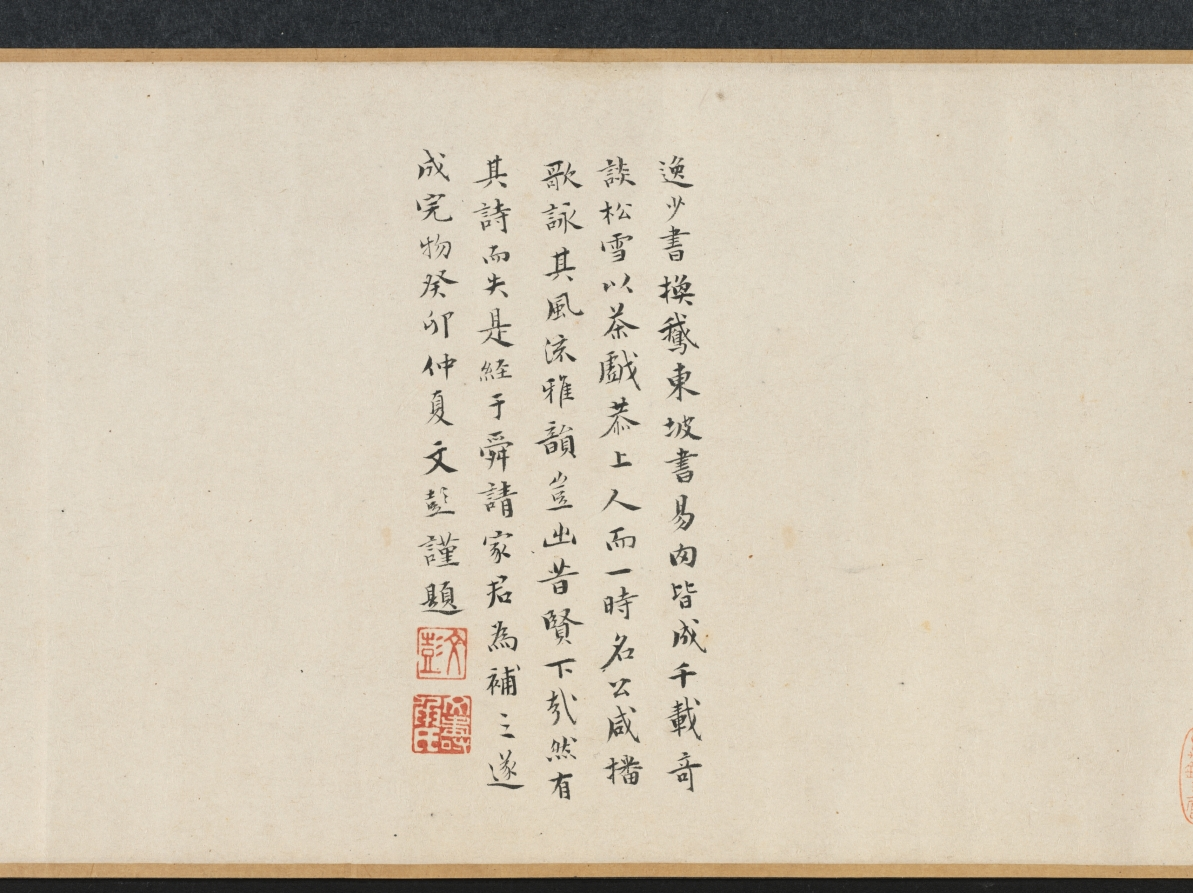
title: Zhao Mengfu Writing the Heart (Hridaya) Sutra in Exchange for Tea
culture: China, Ming dynasty (1368–1644)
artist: Qiu Ying (Chinese, 1494–1552)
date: 1542–43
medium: handscroll, ink and light color on paper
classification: Painting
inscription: Inscription accompanying text of "Heart" sutra, by Wen Zhengming 文徵明 (1470-1559): Zhengming 徵明, written in a boat at Kunshan 崑山, on the twenty-first day of the ninth month, in the renyin 壬寅 year, the twenty-first year of the Jiajing era [1542].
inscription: Colophon by Wang Shih-mou: Chou Yü-shün [Feng-lai] of K'un-shan was a scholarly, refined connoisseur of antiquities. He had acquired the poem written by Chao Ch'eng-chih [Chao Meng-fu] about the exchage of tea for Chao's calligraphy of the Prajna sutra. But the sutra itself, also written by Chao Meng-fu, is lost. He therefore asked Ch'iu Shih-fu [Ch'iu Ying] to do a painting and had Wen Cheng-ming, the artist-in-attendance, write the Hridaya Sutra in the "small, regular" style for replacement. Both works are so excellent that even Chao Meng-fu himself would certainly applaud if he should be reborn to see them. I, Shih-mou, had gotten possession of this scroll from the family of Chou Yü-shün, and since it was so wonderfully matched with one of the treasures in my collection. the Hridaya Sutra written by Chao Meng-fu for Priest Li in "running script," like the reuniting of two halves of a jade pi, I completed the scroll with the several colophons written for the "tea-exchange" poem. I did this because the painting of Ch'iu Ying and the calligraphy of Wen Cheng-ming are definitely masterpieces by themselves with absolutely no need to depend on any of the colophons written for the Chao Meng-fu poem. Furthermore, the two sons of Wen Cheng-ming, Shou-ch'eng [Wen P'eng] and Hsiu-ch'eng [Wen Chia]. have each written a colophon explaining the reason for replacing the calligraphy. As their writings are both acceptable for high standard, I didn't want to throw them away. [So by separating these into two scrolls] I was able to get two complete works of art in one clever stroke. I was quite pleased with myself, and hope that those who see this scroll shall not get suspicious because of the missing colophons. Wang Shih-mou wrote in his Jih-sun-chai study, on the first day of the tenth month, in the chia-shen year of the Wan-li era [1584].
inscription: Colophon by Wen P'eng: I-shao [Wang Hsi-chi] wrote in exchange for a flock of geese. Su Tung-po wrote in exchange for meat. Both episodes have become legends of a thousand years. Sung-hsüeh [Chao Meng-fu] "teased" Priest Kung for tea, and the story was immediately immortalized in the poems by all the famous scholars of the times. Indeed, how could one say his humor and elegance are not equal to the ancient worthies? Unfortunately, the poetry has survived but the writing of the sutra is lost. Yü-shün [Chou Feng-lai] therefore asked my father to make up the writing and so here is the complete work of art. Respectfully inscribed by Wen P'eng in the mid-summer of 1543.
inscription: Colophon by Wen Chia: Sung-hsüeh [Chao Meng-fu], in exchanging tea leaves for his writing of the Prajna, had put himself in the company of Yu-chün [Wang Hsi-chih] who exchanged geese for his writing of the Huang-t'ing sutra [the Yellow Chamber, or the Wai-ching ching, a Taoist text attributed to the Yellow Emperor]. However, was this romantic and cultivated gesture really intended for such small things? Actually, he was only proud that the excellence of his calligraphy had made him worthy to be the successor of the Ch'in Dynasty master. Since, very unfortunately, Chao Meng-fu's writing [of the Prajna] was already lost, my father therefore agreed to replace it, and did the calligraphy in the style of the Yellow Chamber. In addition, Yu-shün [Chou Feng-lai] had asked Mr. Ch'iu Shih-fu [Ch'iu Ying] to do a painting of the sutra writing story in the style of Li Lung-mien at the head of the scroll. Now it would seem the entire episode should go down in history for immortality. Respectfully recorded by Wen Chia, on the eighth day of the eighth month, in the year of k'uei-mao [1543]. trans. WKH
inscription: 4 colophons and 23 seals: 1 colophon, dated 1543, and 2 seals of Wen Peng (1498-1573); 1 colophon, dated 1543, and 2 seals of Wen Chia (1501-1583); 1 colophon, dated 1584, and 3 seals of Wang Shih-mou (1536-1588); 2 seals of Chou Feng-lai (16th c.); 3 seals of Sung Lo (1634-1713); 5 seals of the Ch'ien-lung emperor (r. 1736-95); 1 colophon, dated 1902, and 1 seal of Fei Nien-tz'u (1885-1905); 4 seals of Wan-go H. C. Weng (b. 1918); 1 seal unidentified.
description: The Yuan dynasty calligrapher Zhao Mengfu (1254–1322) is said to have transcribed the Heart Sutra for a certain priest named Li in exchange for tea. Later, during the Ming dynasty, the professional painter Qiu Ying from Suzhou painted this scene for his patron. Here, Zhao Mengfu holds a brush and has a piece of paper laid out before him. On the table is an ink stone, an ink stick, and a small water dropper. Drops of water would dissolve the ink stick into liquid ink when it was ground on the flat square stone.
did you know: Qiu Ying was born to a peasant family, but his natural talent led him to a successful career as a professional painter with wealthy patrons.